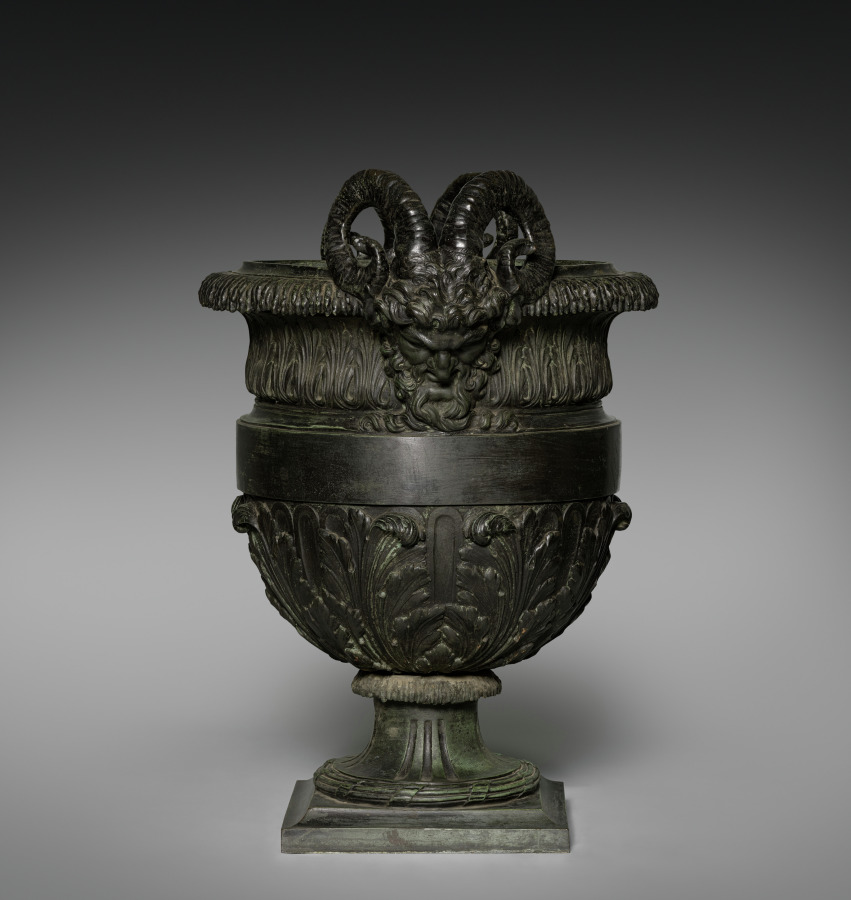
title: Urn with Satyr Heads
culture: France, 18th century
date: 1700s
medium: bronze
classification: Metalwork